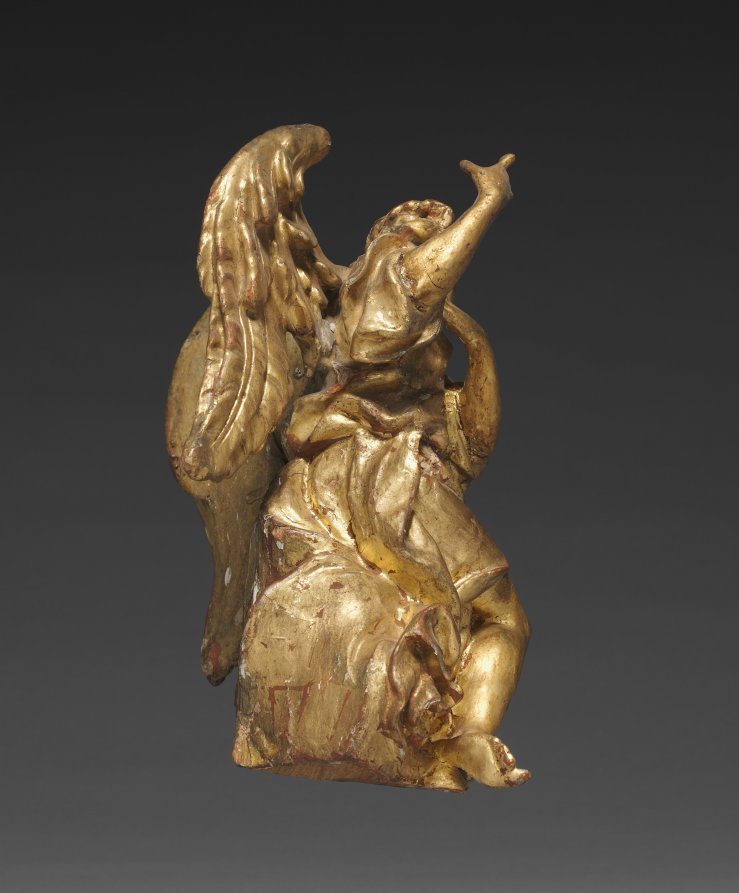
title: Altarpiece with Relics - Angel, lower left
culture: Germany, Bavaria, 18th century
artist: Joseph Matthias Götz (German, 1696–1760)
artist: and Workshop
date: c. 1735–40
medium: gilded wood, with relics in niches: gilded wood, mother-of-pearl, ebony, red silk, gold wire, seed pearls, rock crystal, pen and ink on paper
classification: Sculpture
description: Götz covers every surface in gold leaf, giving each part of the object equal importance, rather than simply framing a central picture. In this distinctively Central European approach, figural narrative is subordinate to the overall ensemble. Götz designed this object to rest on top of an altar, probably in front of a larger painted or sculpted decorative scheme. The work contains relics seen through the small windows on the perimeter. These small remains of holy figures demonstrate the persistence of a medieval Catholic tradition well into the 1700s.